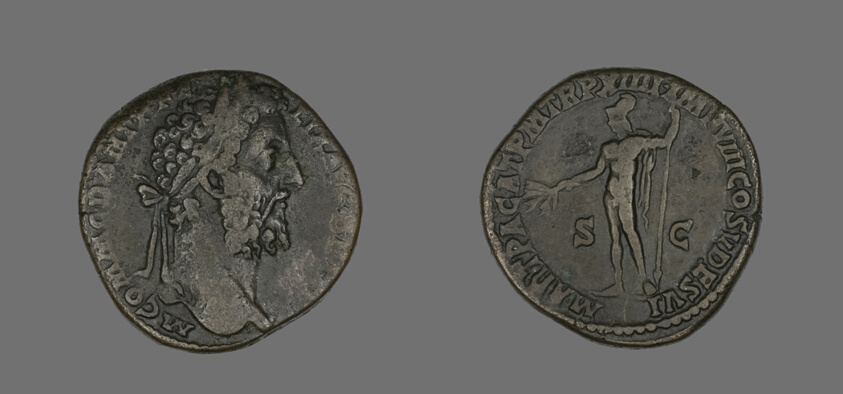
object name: Coin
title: Sestertius (Coin) Portraying Emperor Commodus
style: roman (ancient, style or period), ancient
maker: Roman, minted in Rome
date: 189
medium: Bronze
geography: Roman Empire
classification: coin; ancient art